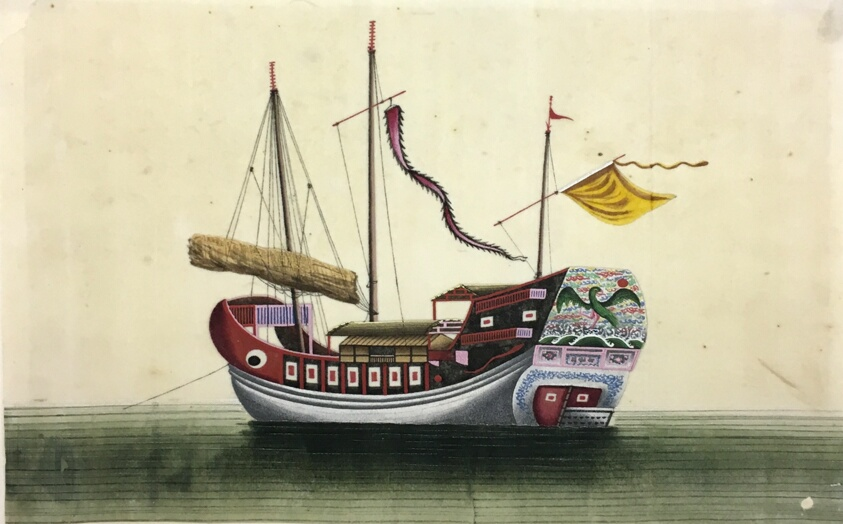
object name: Painting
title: Ship paintings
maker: China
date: mid 19th century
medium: Album of ten leaves; watercolor on paper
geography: Guangdong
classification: painting; asian art